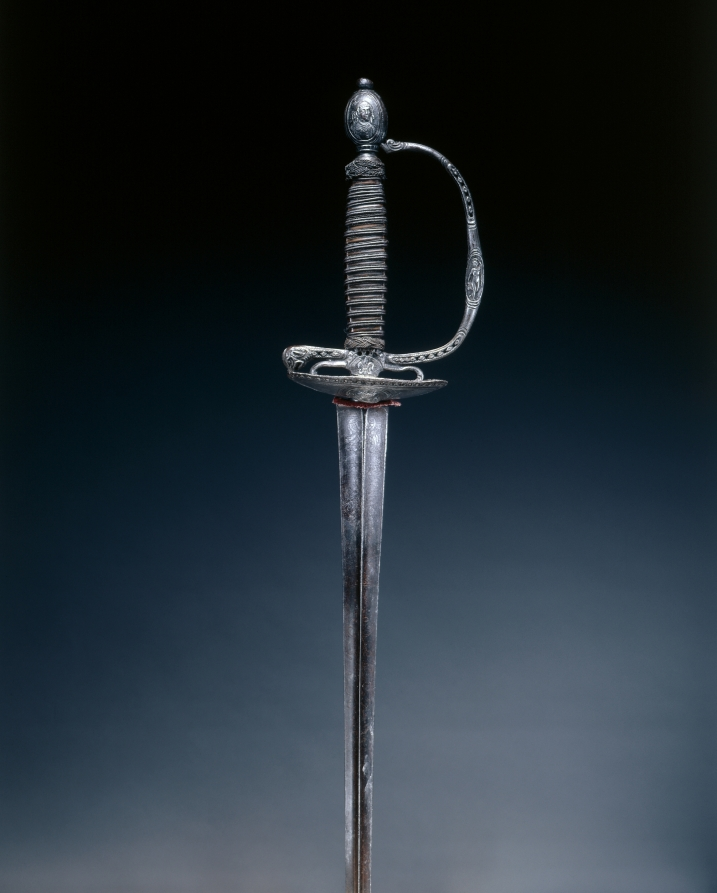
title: Small Sword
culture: France, late 17th Century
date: late 1600s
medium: steel, chiseled and pierced; iron, wood; wire-bound grip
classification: Arms and Armor